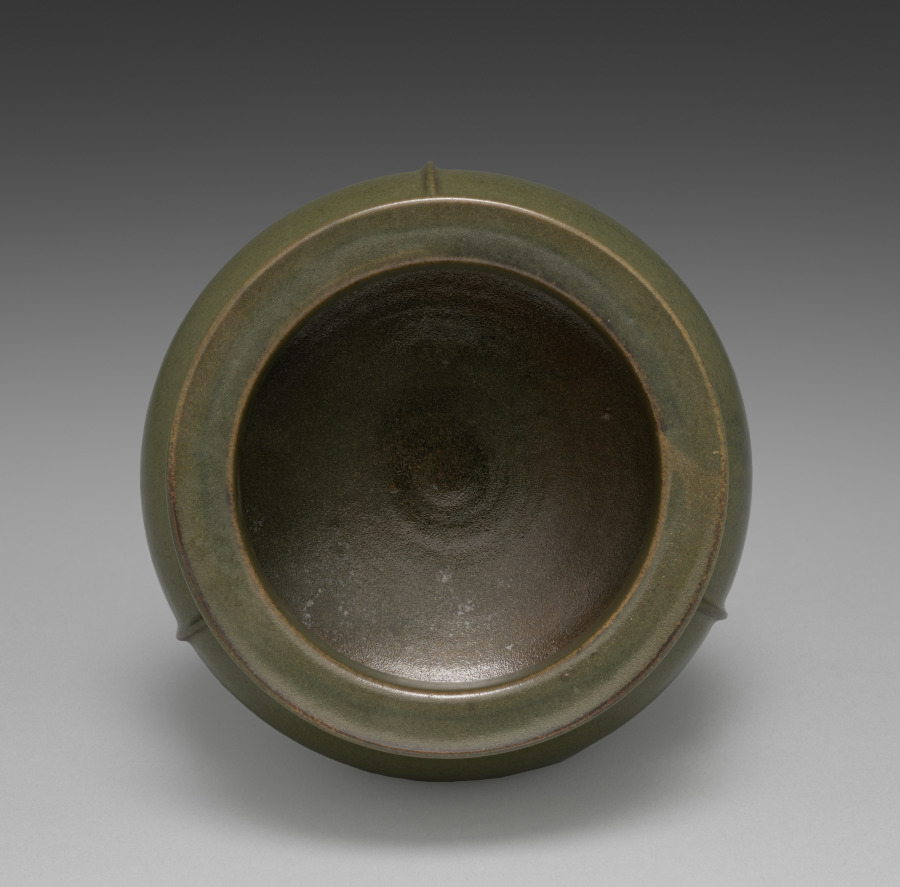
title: Incense Burner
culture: Japan, Meiji period (1868–1912)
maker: Seifū Yohei III (Japanese, 1851–1914)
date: 1895–1914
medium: Porcelain with tea-leaf colored glaze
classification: Ceramic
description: Kyoto-based Japanese ceramist Seifū Yohei III (1851–1914) admired the glaze colors found on Chinese porcelain and tried to replicate them through intensive experimentation. His green and creamy white glazes were particularly well received. The combinations of colors with subtle molded and incised decorations in his ceramics respond powerfully to changes in light, creating a dynamic viewing experience. Names for the glazes, written in ink with a brush on the lids of the custom-made storage boxes for the works, often indicate a specific glaze or ware that had inspired him, even when the resulting color was distinctively his own.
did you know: This globular incense burner has a tea leaf colored glaze and linear molded decorations running around the base of the collar and down the legs.